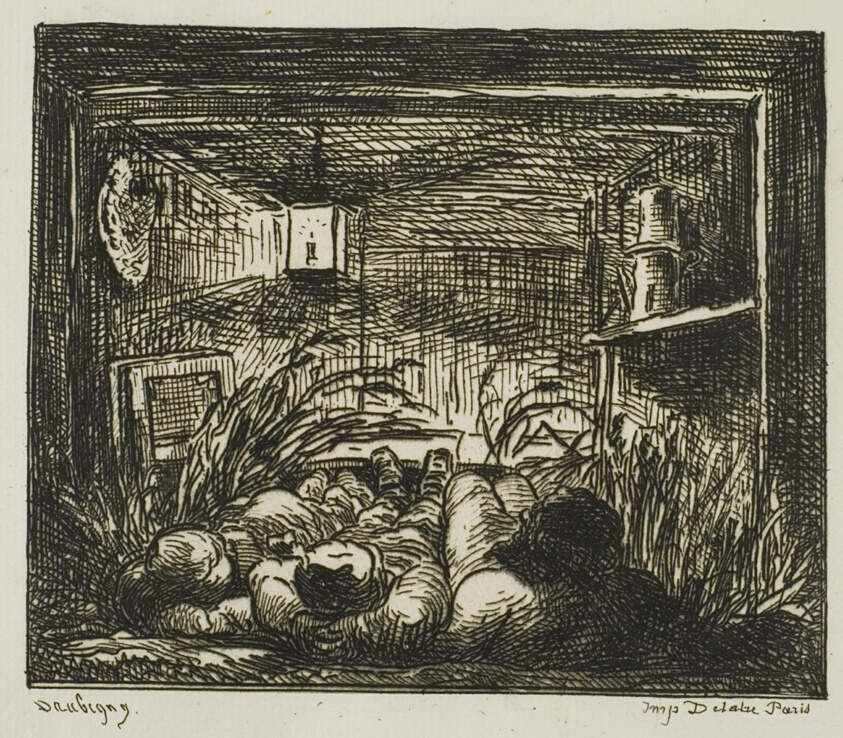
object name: Print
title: Bedding Down on the Boat (Night on the boat)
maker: Charles François Daubigny (French, 1817-1878)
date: 1861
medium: Etching on ivory laid paper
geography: France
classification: etching; print; prints and drawing